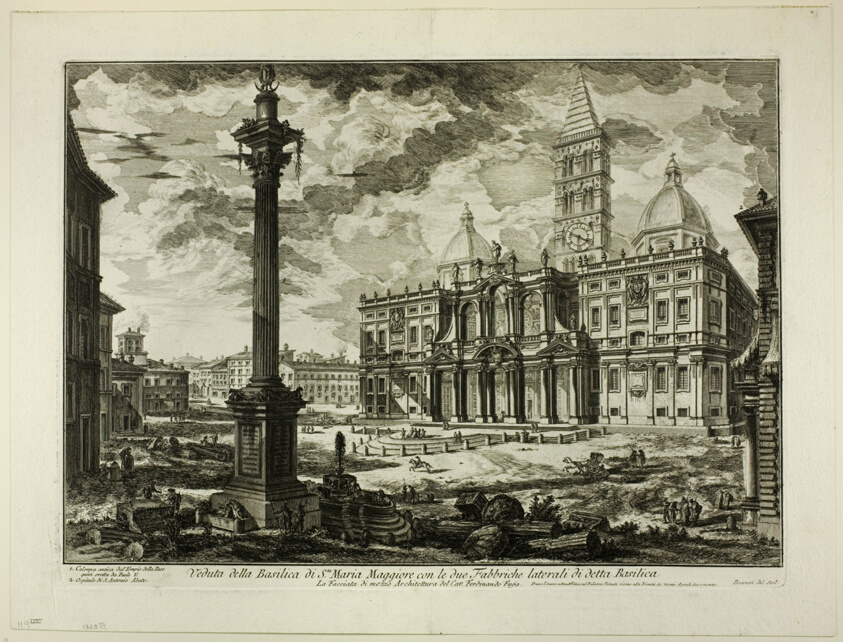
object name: Print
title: View of the Basilica of S. Maria Maggiore with its two flanking wings, from Views of Rome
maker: Giovanni Battista Piranesi (Italian, 1720-1778)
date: 1749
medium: Etching on heavy ivory laid paper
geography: Italy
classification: etching; print; prints and drawing